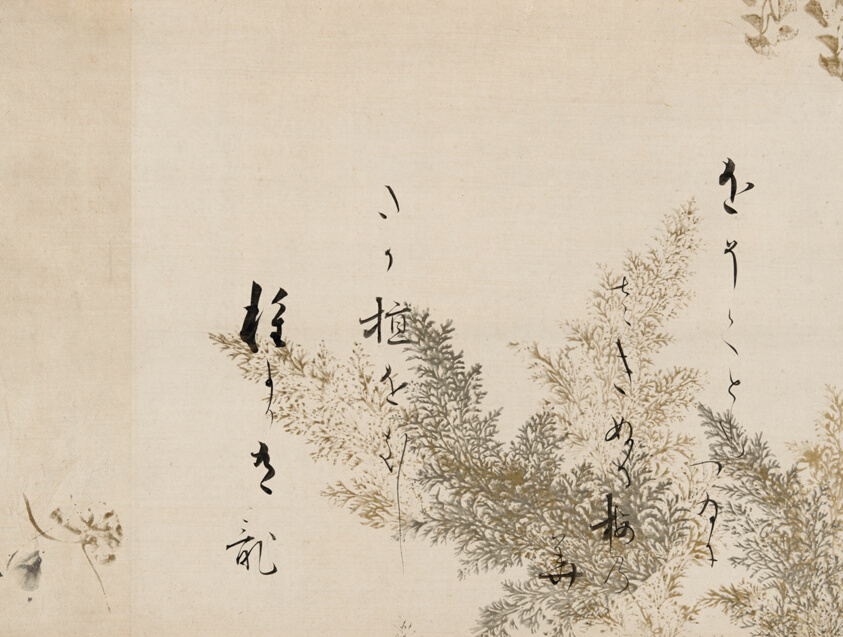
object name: Painting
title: A Poem from the Shin Kokinshu with Design of Shinobugusa (Moss Fern)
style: Japanese (culture or style)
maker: Hon'ami Kōetsu; Japanese, 1558-1637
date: 1605-10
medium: Fragment of a handscroll mounted as a hanging scroll; ink, gold, silver-colored pigment, and mica on paper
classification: painting